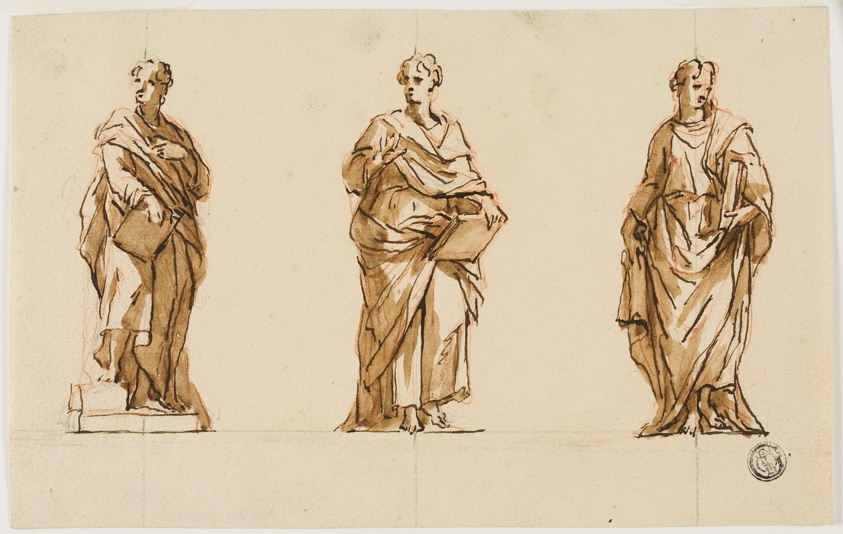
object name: Drawing and Watercolor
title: Three Studies for Statue of John Locke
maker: John Michael Rysbrack (Flemish, 1693-1770)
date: c. 1754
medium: Pen and brown ink, with brush and brown wash, over red chalk and graphite, on cream laid paper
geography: Flanders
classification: pen and ink drawings; drawings (visual works); prints and drawing